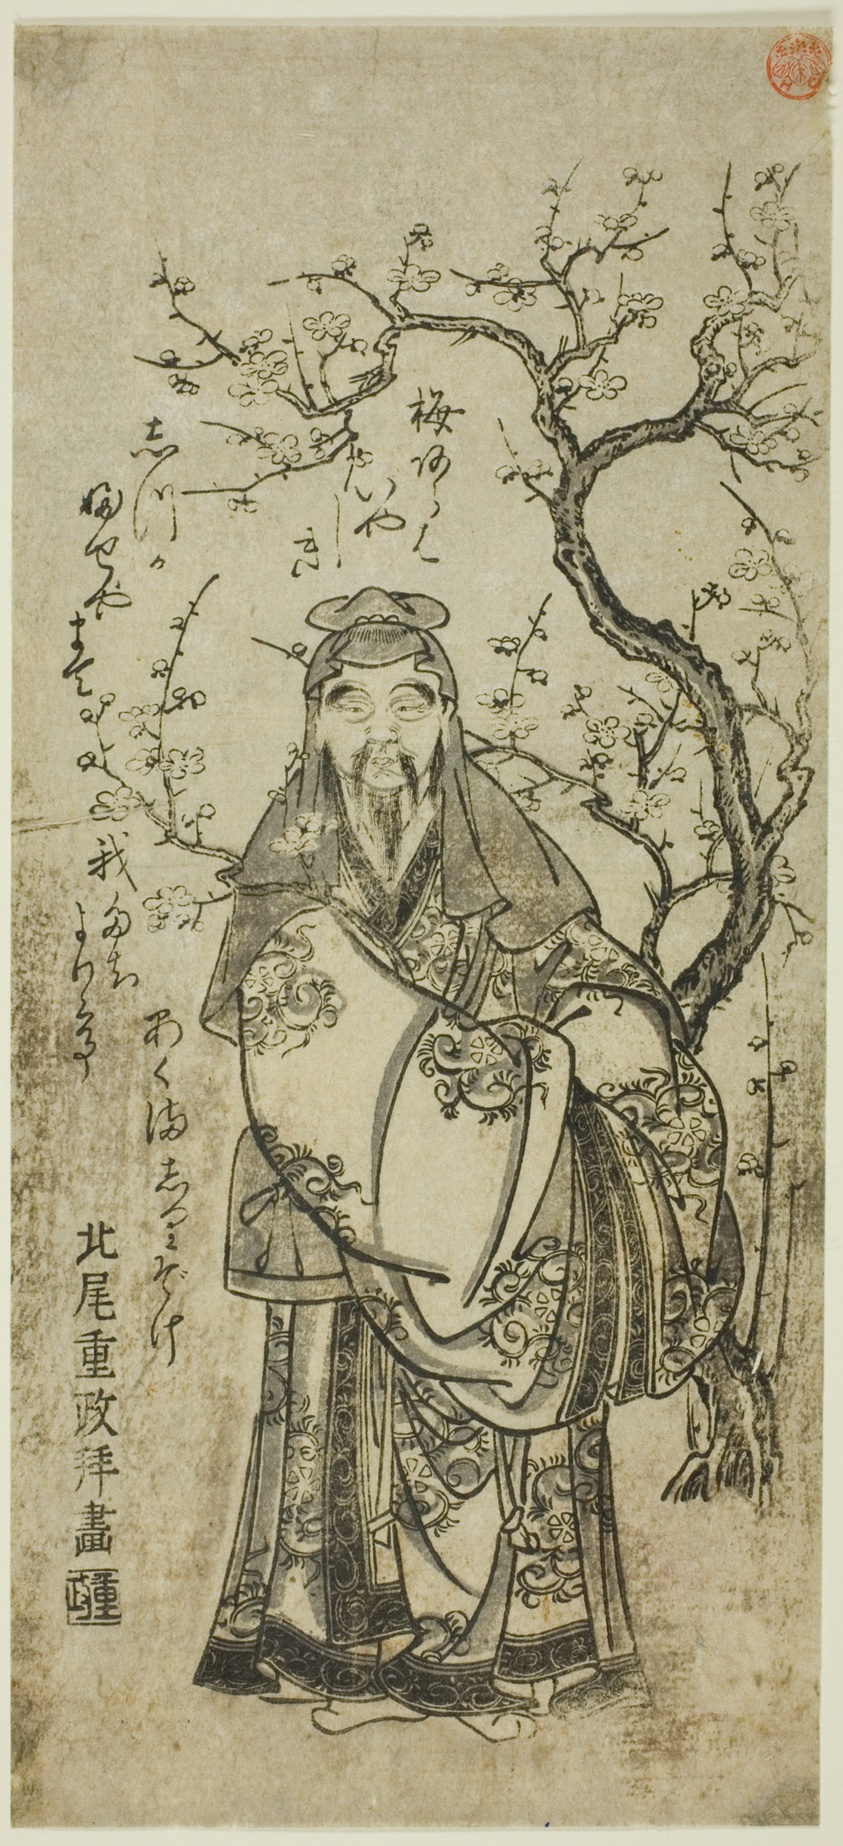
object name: Print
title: Sugawara Michizane crossing to China (Toto Tenjin)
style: Japanese (culture or style)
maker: Kitao Shigemasa (Japanese, 1739-1820)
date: c. 1770s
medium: Woodblock print; hosoban, sumizuri-e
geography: Japan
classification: woodblock print; print; asian art; woodblock